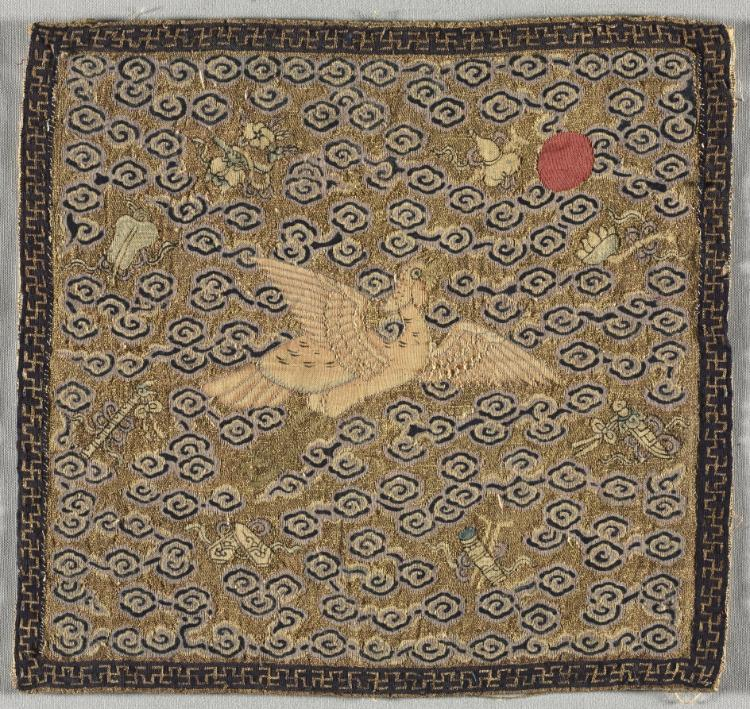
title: Rank Badge (buzi)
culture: China, Qing dynasty (1644-1911)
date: 1850–99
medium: silk and metal thread; slit tapestry weave (kesi)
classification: Textile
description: Rank badges (also called rank insignia or Mandarin squares) were used in China during the Ming (1368–1644) and Qing (1644–1911) dynasties to demonstrate the wearer’s rank. In 1391 new clothing regulations directed court officials to wear decorative squares indicating their rank—birds for civil officials and animals for military officials. During the Qing dynasty rank badge design was regulated, and certain creatures were associated with specific ranks. Qing badges depict a representation of the universe with a landscape and a central creature, surrounded by clouds and facing the sun. The sun represented the emperor and this composition showed the official’s loyalty to him. An official’s wife wore rank badges that mirrored her husband’s. Most of the examples in CMA’s collection depict creatures facing a sun on the left. Attached to the front and back of a ceremonial robe, rank badges were woven in pairs with identical imagery. One was divided vertically up the center to attach to the front of a robe with a center opening. Rank badges are generally square or rectangular, although round examples exist. They are typically satin weave or slit tapestry weave (kesi) silk. Satin weave badges often have dark backgrounds with silk and/or metal thread embroidery. Some badges incorporate peacock feathers or beads. Late in the Qing dynasty appliqué replaced embroidery to allow for quicker production and a change in rank.